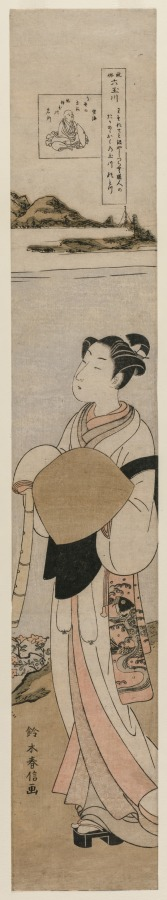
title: The Priest Kukai by the Tama River at Mt. Koya (From the Series The Six Tama Rivers in Everyday Life)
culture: Japan, Edo period (1615–1868)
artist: Suzuki Harunobu (Japanese, 1724–1770)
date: late 1760s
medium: color woodblock print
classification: Print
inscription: Signature: Suzuki Harunobu ga